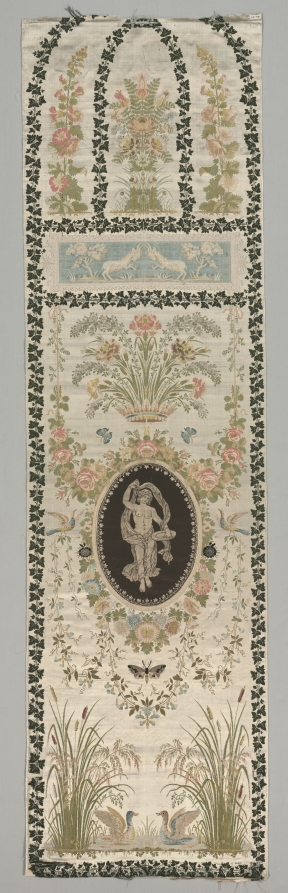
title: Wall Covering with Classical Figure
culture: France, late 18th-early 19th Century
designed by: Philippe de Lasalle (French, 1723–1805)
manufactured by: Camille Pernon & Cie (French)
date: late 1700s - early 1800s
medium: Silk: llampas (satin weave and plain weave variant), brocaded, appliquéd, embroidered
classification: Textile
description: France developed a thriving silk industry in Lyon with the goal of becoming the fashion center of Europe. Employment soared to some 20,000 workers by the time of the French Revolution in 1789. Designs changed annually, colors established new fashions, and spectacular silks were produced during the late 1700s. Philippe de Lasalle, trained as a painter by François Boucher, became the celebrated chief textile designer for Camille Pernon & Cie, purveyors to King Louis XVI (reigned 1785-90). Lasalle’s floral style with large and balanced designs, enhanced here with a fashionable classical figure, displays his preference for lighter forms without the opulent gold thread of earlier brocaded silks.